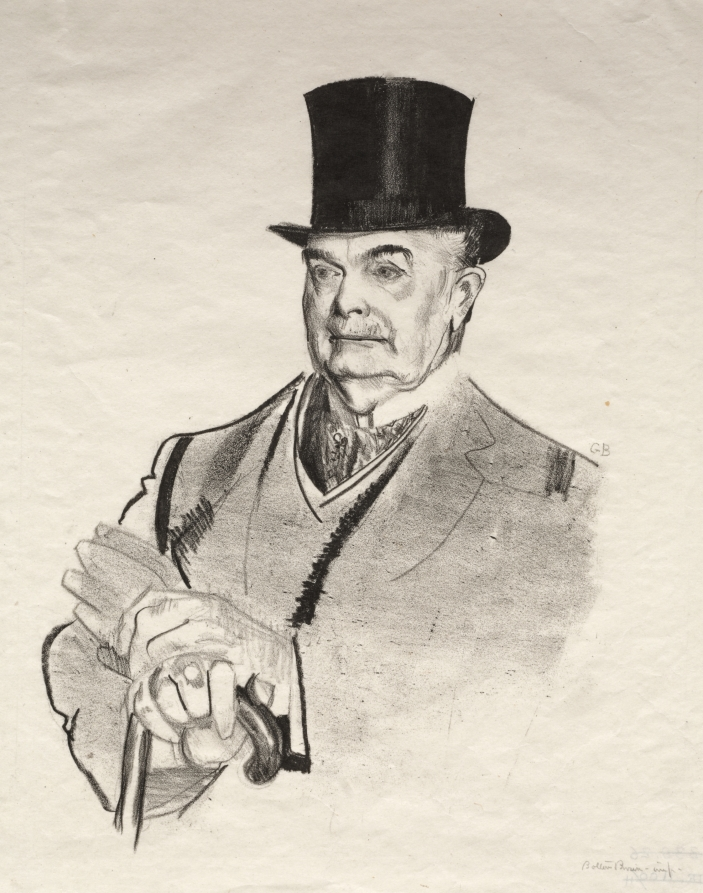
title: W. E. Story, Esq., first state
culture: America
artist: George Bellows (American, 1882–1925)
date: 1921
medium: lithograph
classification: Print